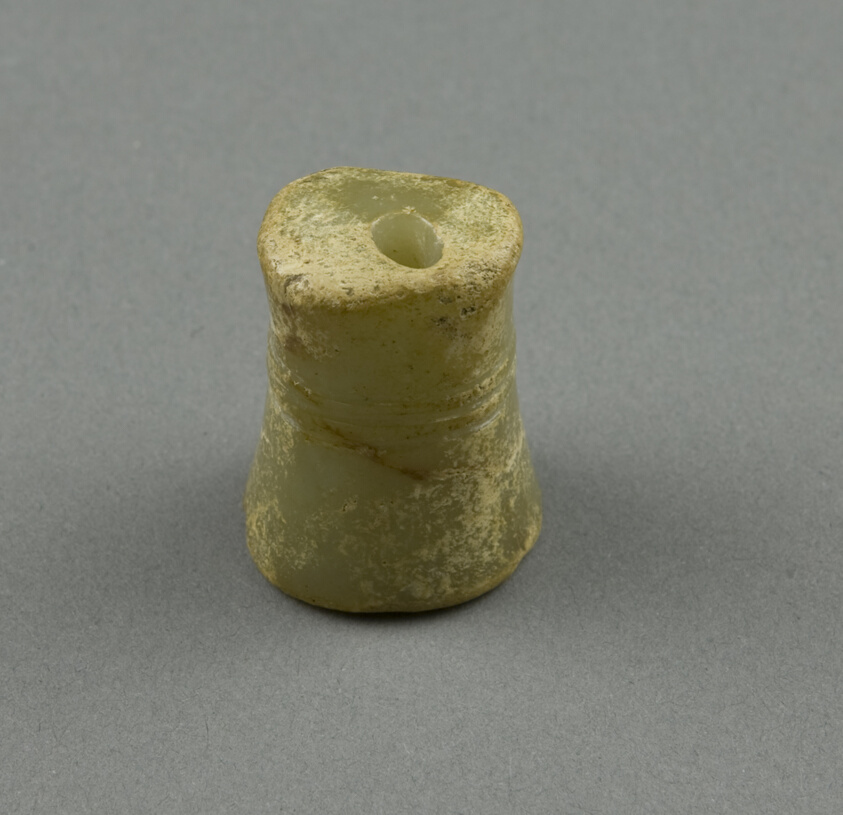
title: Bead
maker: China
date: Early Western Zhou dynasty (1047BC-772BC)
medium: Jade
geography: China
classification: jade; asian art